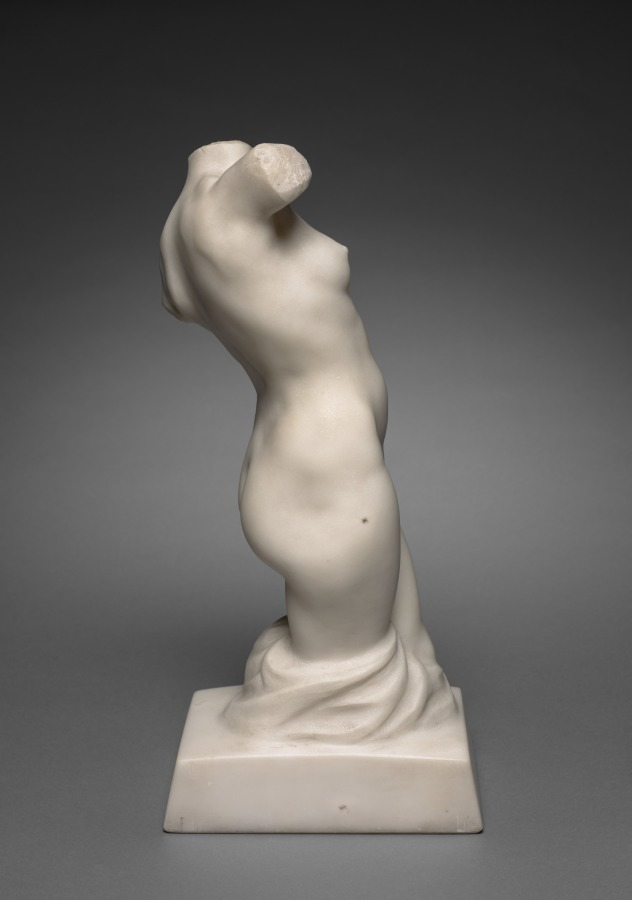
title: Torso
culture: America, Ohio, Cleveland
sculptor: Max Kalish (American, born Russian Empire [now Lithuania], 1891–1945)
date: 1924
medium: marble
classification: Sculpture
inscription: Signed on right side near side of base.: "M. Kalish 24"